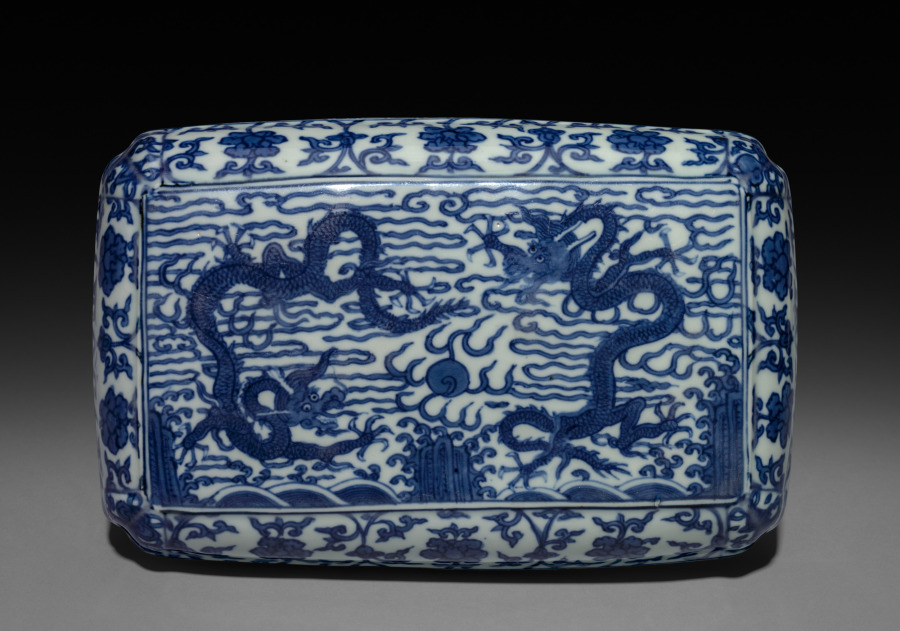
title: Covered Box with Dragons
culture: China, Jiangxi province, Jingdezhen kilns, Ming dynasty (1368-1644), Wanli reign (1572-1620)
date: 1573–1620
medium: porcelain with underglaze blue decoration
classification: Ceramic